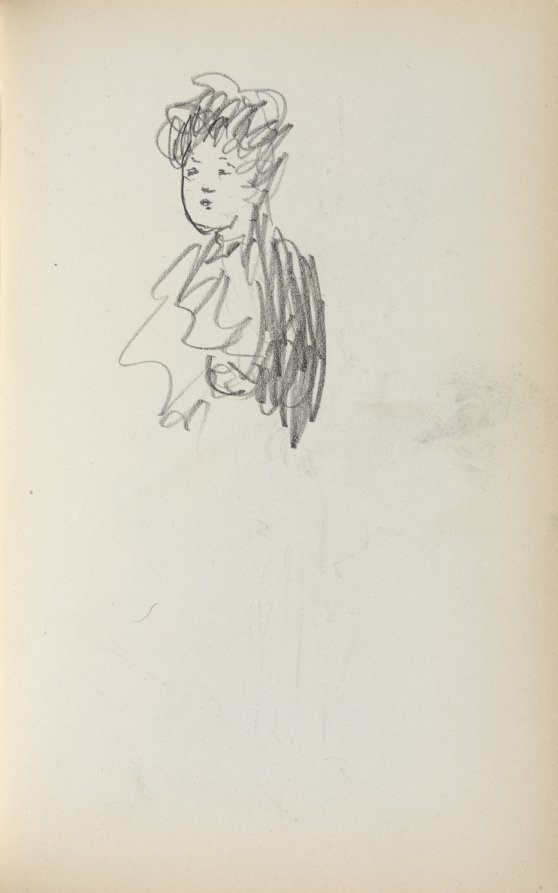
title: Italian Sketchbook: Woman, bust length (page 127)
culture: America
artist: Maurice Prendergast (American, born Newfoundland [now Canada], 1858–1924)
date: 1898–1899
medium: pencil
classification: Bound Volume